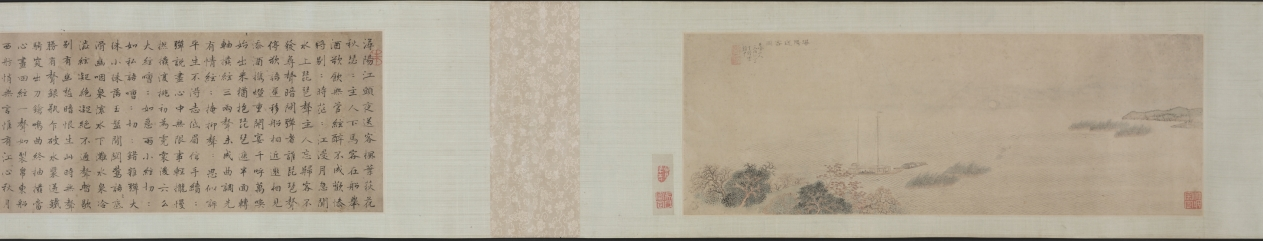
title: Saying Farewell at Xunyang (Song of the Pipa)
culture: China, Ming dynasty (1368–1644)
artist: Wen Boren (Chinese, 1502–1575)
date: 1500s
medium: handscroll, ink and color on paper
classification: Painting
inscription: "潯陽送客圖" 五峰山人文伯仁寫于停雲館中 [印] 文伯仁; 五峰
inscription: 2 colophons and 9 additional seals: 1 transcription of "Pipa xing 琵琶行” (Song of Pipa) and 3 seals of Zhu Yizun 朱彜尊 (1629-1709); 2 seals of Wu Rongguang 吳榮光 (1773-1843); 1 colophon, dated 1826, and 3 seals of Wu Xijia 吳錫嘉 (mid-1700s)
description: This handscroll depicts The Song of the Pipa, a poem by Bai Juyi 白居易 (772–846) written after the poet’s encounter with a pipa player on the Yangzi River. Expelled from her home city when her beauty and fame had faded, she played for the poet at night. Her musical performance and tragic life story resonated with Bai Juyi, who had just been demoted and exiled from life at court himself. The hazy, vast view and pale color tonalities of this painting illustrate these feelings of endless sadness, having lost one’s sense of purpose in life.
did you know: Wen Boren depicted the chilly autumn water with a fishnet pattern.